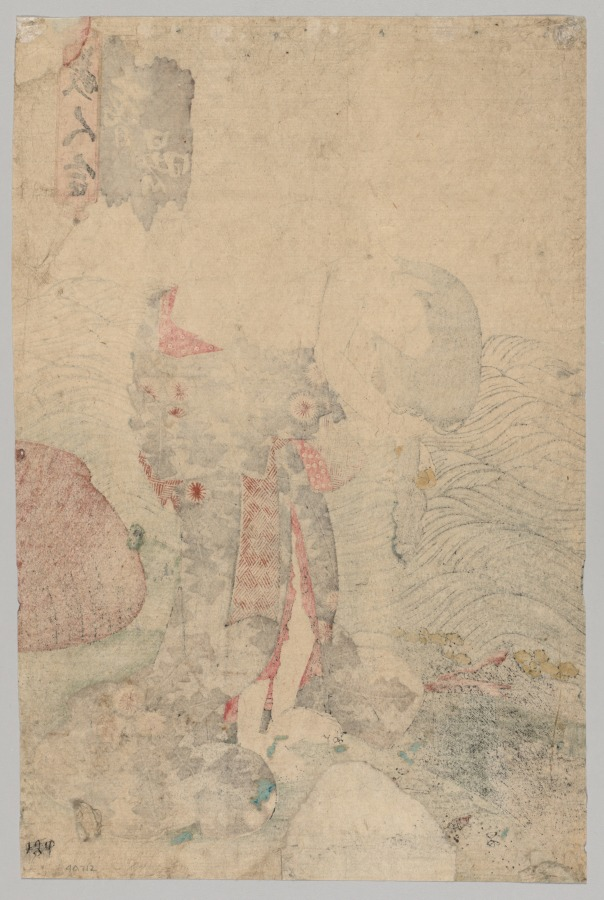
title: Woman Diver Combing her Hair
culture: Japan, Edo period (1615–1868)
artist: Utagawa Kunisada (Japanese, 1786–1865)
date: 1786–1864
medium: color woodblock print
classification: Print